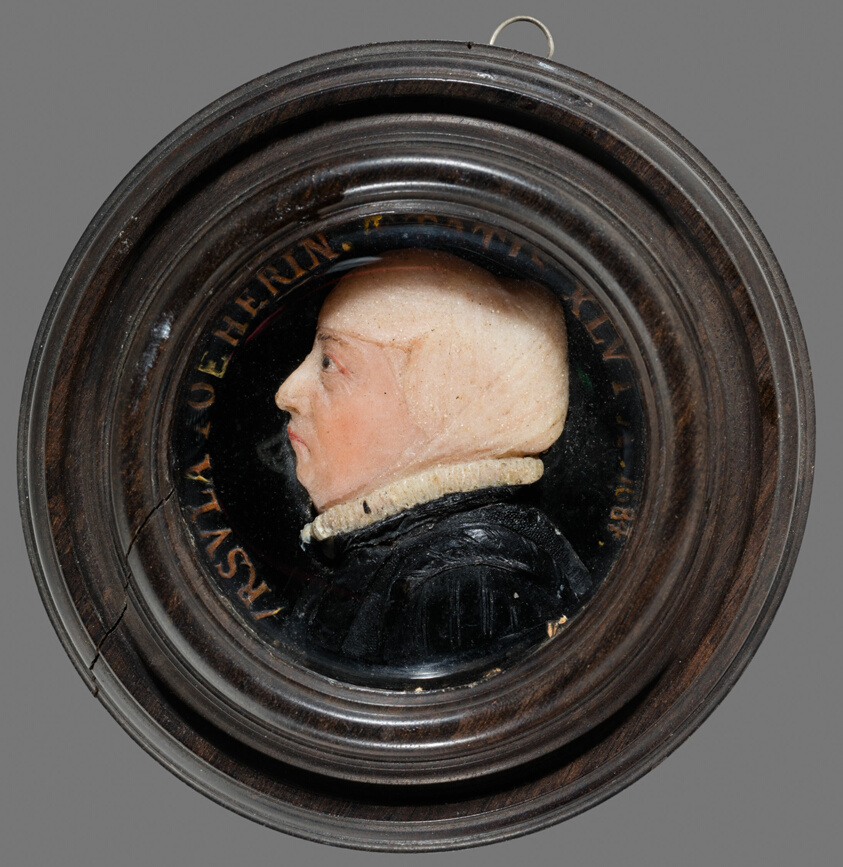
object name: Sculpture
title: Portrait of Ursula Lother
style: sixteenth century, 16th Century, Renaissance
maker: German; Nuremberg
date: 1584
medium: Wax on glass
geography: Germany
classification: wax portrait; relief; sculpture; german; portrait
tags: portraits: female subject, black (color), headdresses, portrait, portraits, portraits: German subject, profile, woman